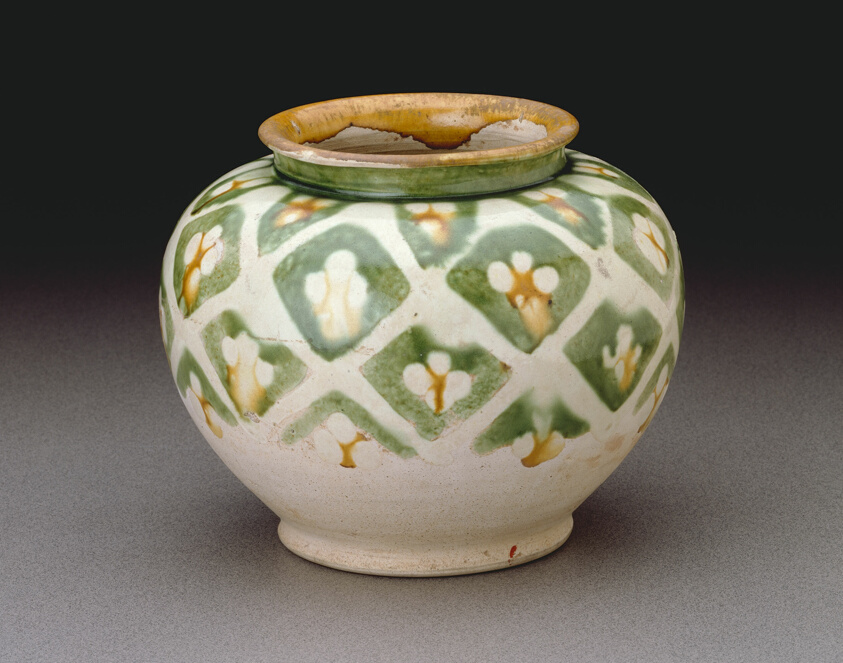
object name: Vessel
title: Jar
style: Chinese (culture or style)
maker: China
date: Tang dynasty (618–907), first half of 8th century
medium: Earthenware with three-color (sancai) lead glazes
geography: China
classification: earthenware; asian art; ceramics; vessel